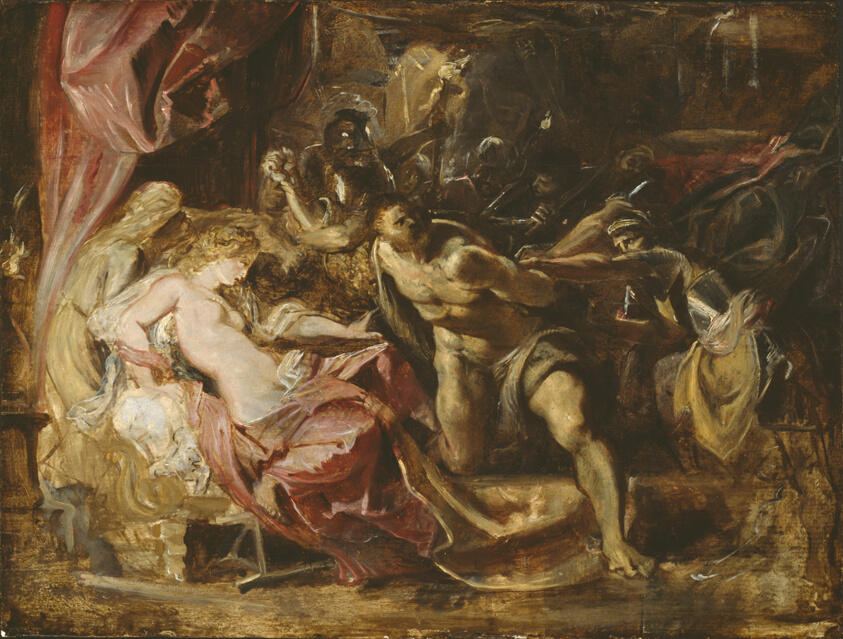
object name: Painting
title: The Capture of Samson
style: 17th Century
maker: Peter Paul Rubens (Flemish, 1577-1640)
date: 1609–10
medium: Oil on panel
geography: Flanders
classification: oil on panel; paint; painting; european painting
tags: biblical, figures, interior, man, men, violence, woman, women